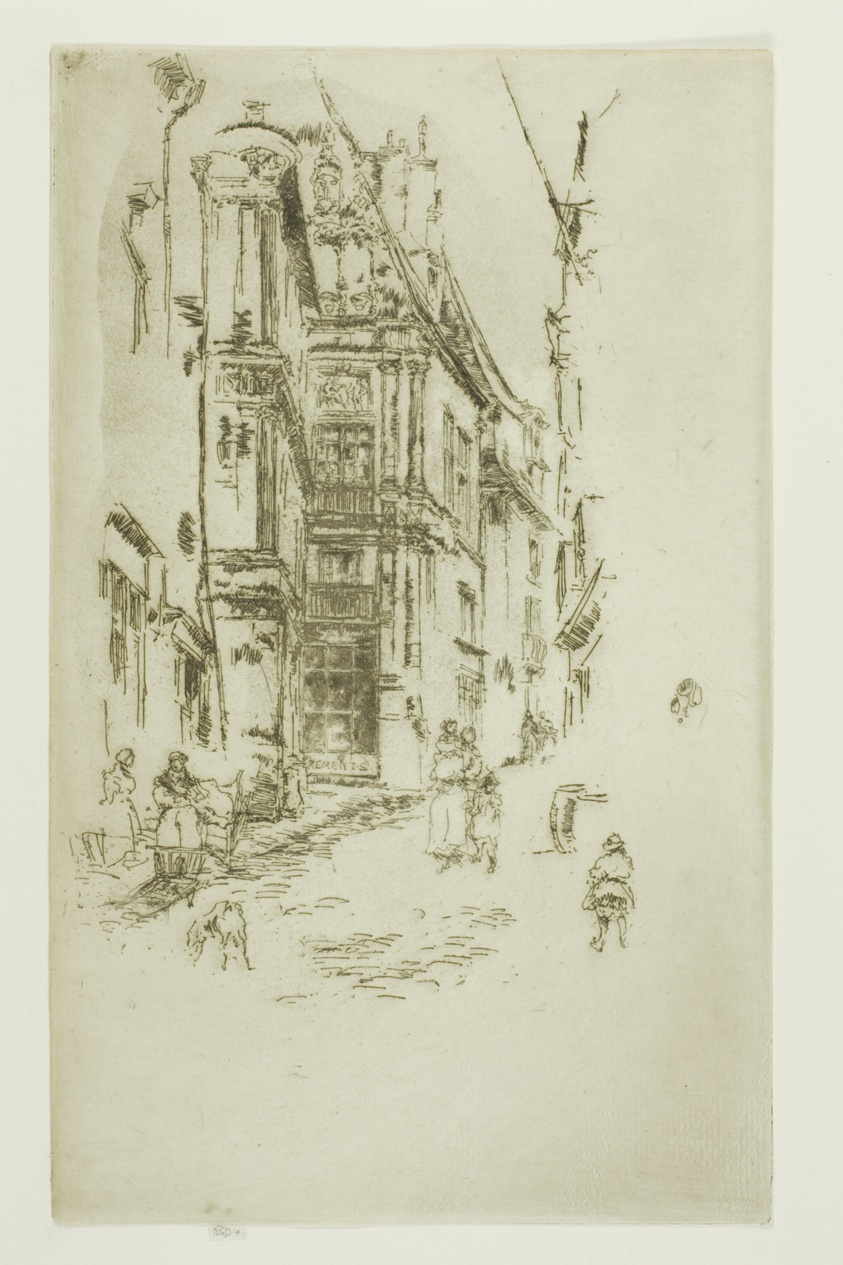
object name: Print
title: Chancellerie, Loches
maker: James McNeill Whistler (American, 1834-1903)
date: 1888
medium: Etching with foul biting in black ink on cream laid paper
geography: United States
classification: etching; foul biting; print; prints and drawing; paper